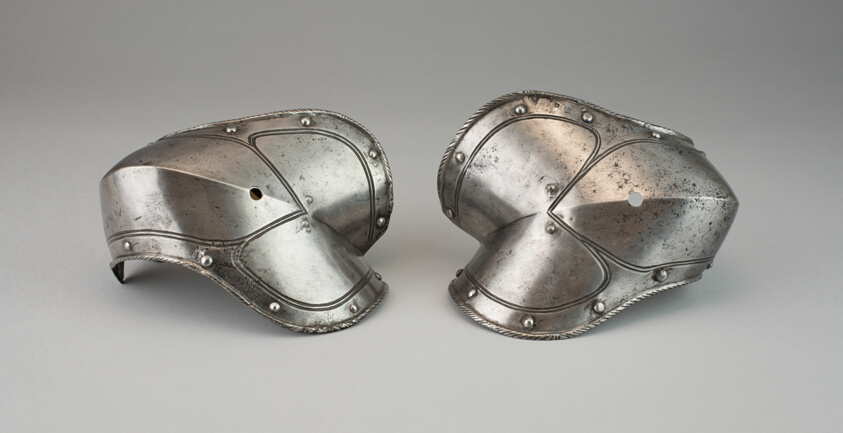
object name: Armor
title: Pair of Cowters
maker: Northern German (probably)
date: 1570/1630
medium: has been associated with armor 2150 - 1982.2398a-g; arm defenses separated - do not belong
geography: Northern Germany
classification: suit-element; armor; arms and armor